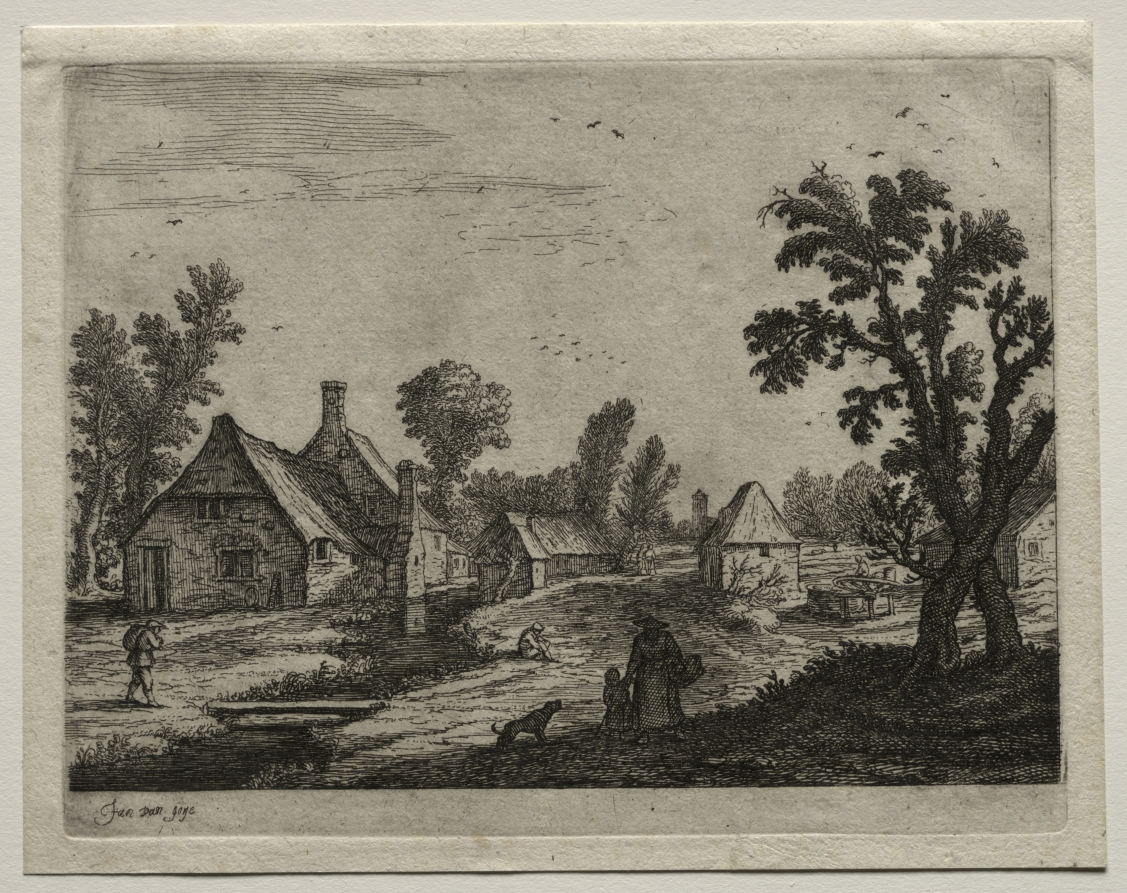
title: The Plank over the Stream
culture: Netherlands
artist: Jan van Goyen (Dutch, 1596–1656)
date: c. 1650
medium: etching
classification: Print